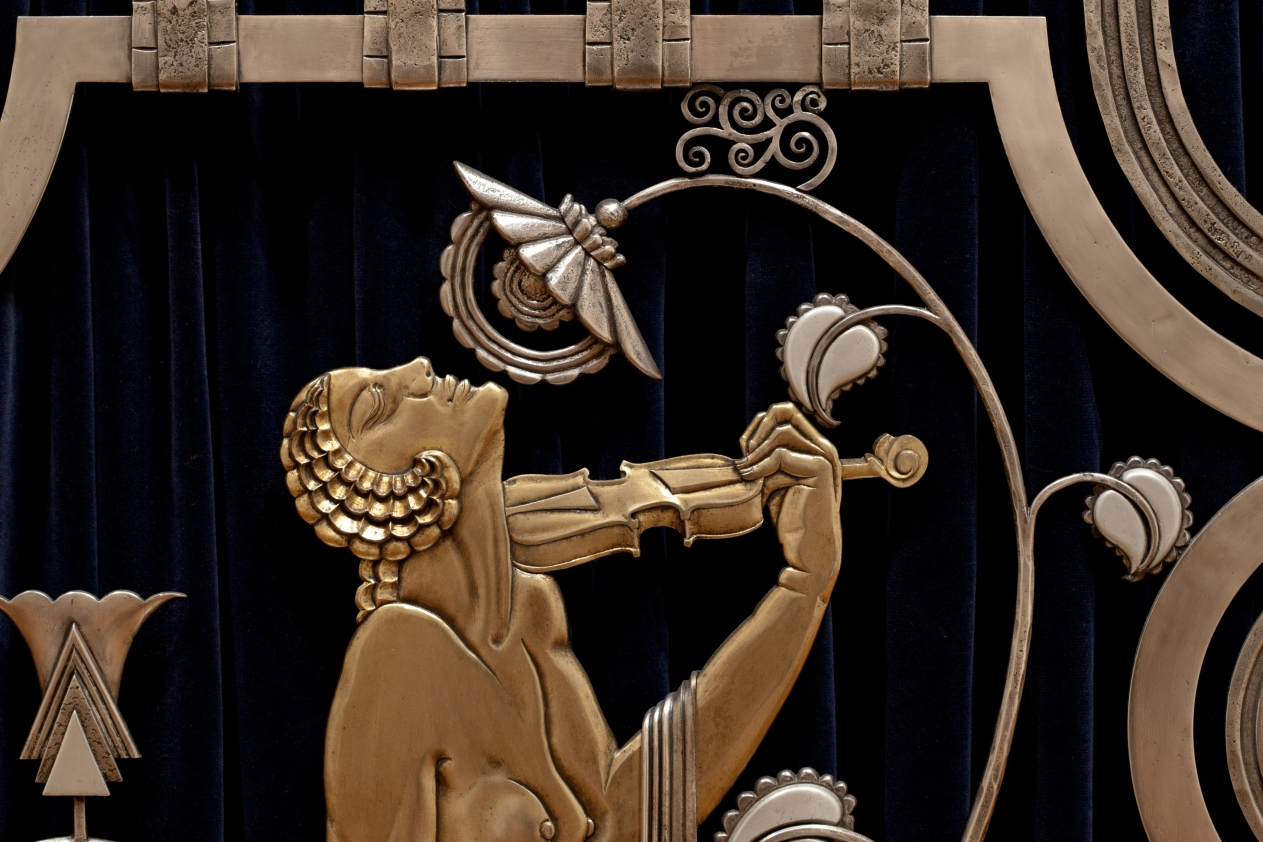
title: Muse with Violin Screen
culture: America, Ohio, Cleveland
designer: Paul Fehér (American, born Hungary, 1898–1990)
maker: Rose Iron Works (America, Ohio, Cleveland, est. 1904)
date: 1930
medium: Steel, brass; silver and gold plating, cotton velveteen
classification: Metalwork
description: Since the early years of the 20th century, the Rose Iron Works, a Cleveland supplier of architectural ornament, has produced distinguished metalwork. The company’s founder, Martin Rose, was born in Austria-Hungary and studied ornamental metalsmithing in Vienna prior to immigrating to Cleveland in 1902. In the 1920s, he hired a talented young Parisian designer, Paul Fehér, to work for the firm. Fehér’s designs, culminating in this massive screen, brought a modern European sensibility to the Rose Iron Works production. With its geometric patterning, highly stylized and abstracted natural forms, and the central figure reminiscent of the celebrated jazz singer Josephine Baker, this screen reflects the classic motifs of Art Deco design.